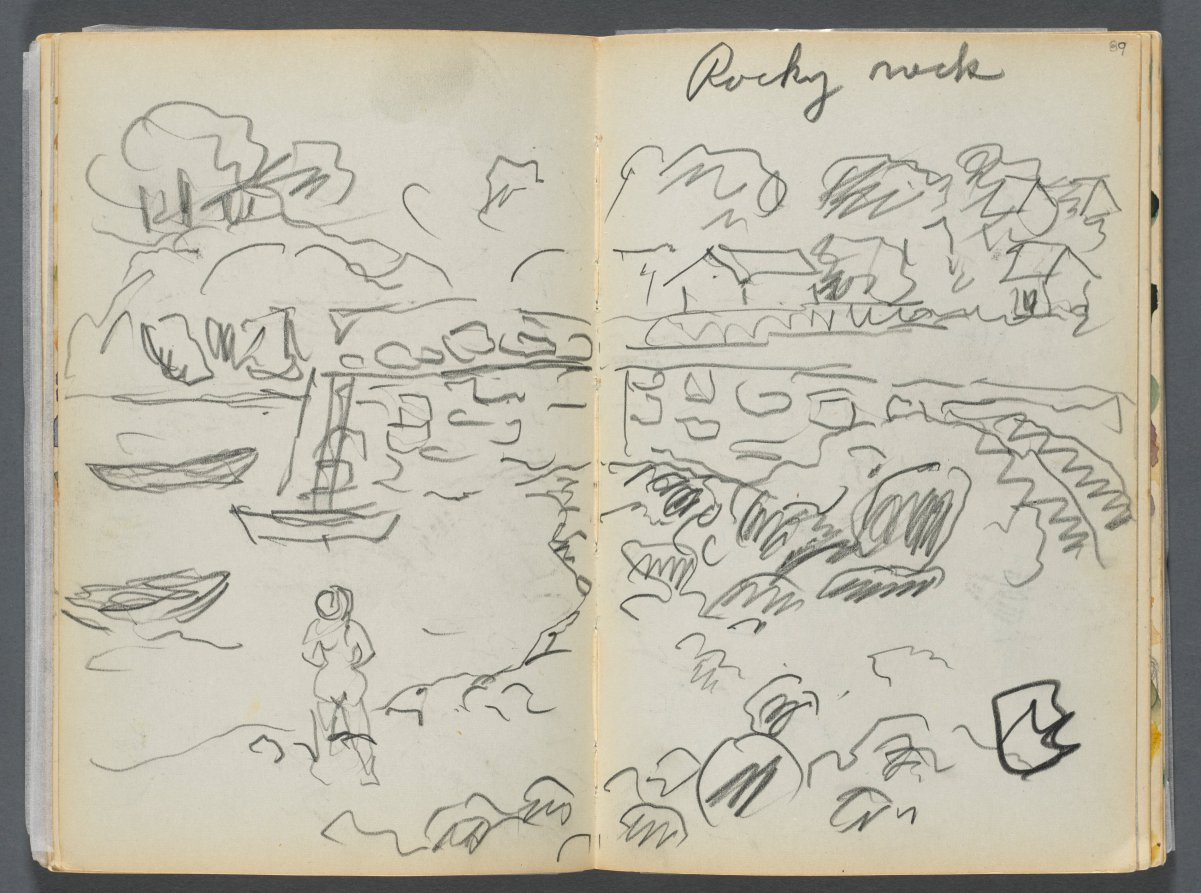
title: Sketchbook- The Granite Shore Hotel, Rockport, page 088 & 89: "Rocky Neck"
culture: America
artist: Maurice Prendergast (American, born Newfoundland [now Canada], 1858–1924)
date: 1905–10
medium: graphite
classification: Bound Volume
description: This sketchbook contains 72 pages of pencil drawings and 9 watercolors of Cape Ann. On the inside of the cover Prendergast wrote the address of the Granite Shore Hotel in Rockport, Massachusetts.